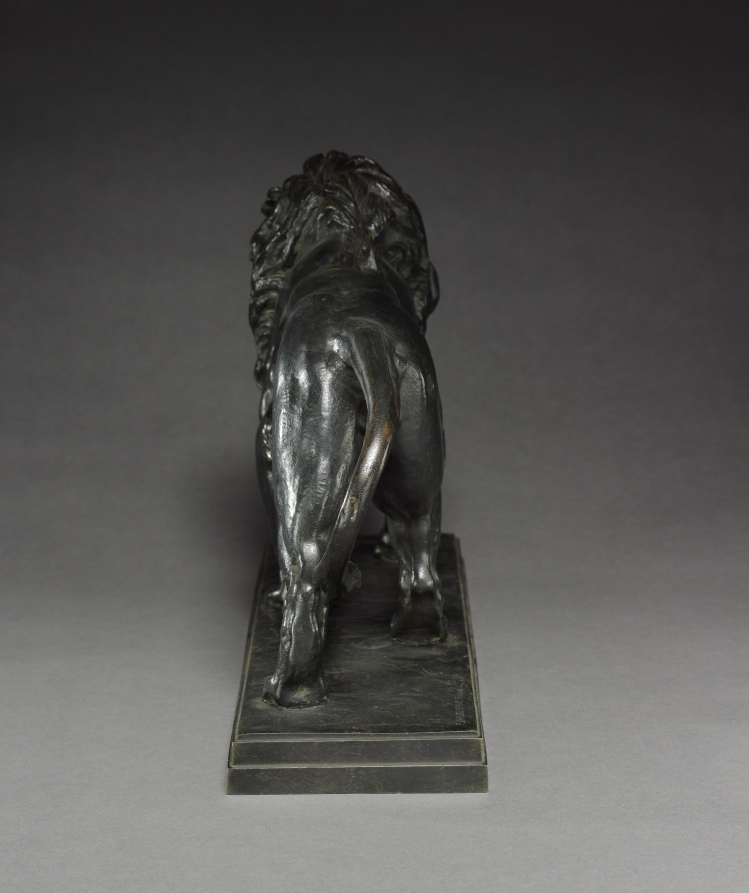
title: Walking Lion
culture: France, 19th century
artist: Antoine-Louis Barye (French, 1796–1875)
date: after 1836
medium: bronze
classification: Sculpture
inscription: Written on base: "Barye"